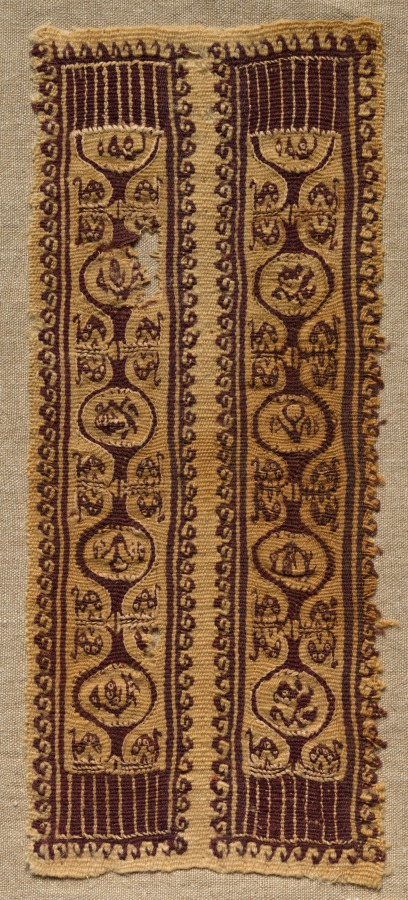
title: Fragment, Sleeve Ornament from a Tunic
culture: Egypt, Byzantine period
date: 400s - 600s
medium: tabby weave with inwoven tapestry ornament, linen and wool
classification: Textile